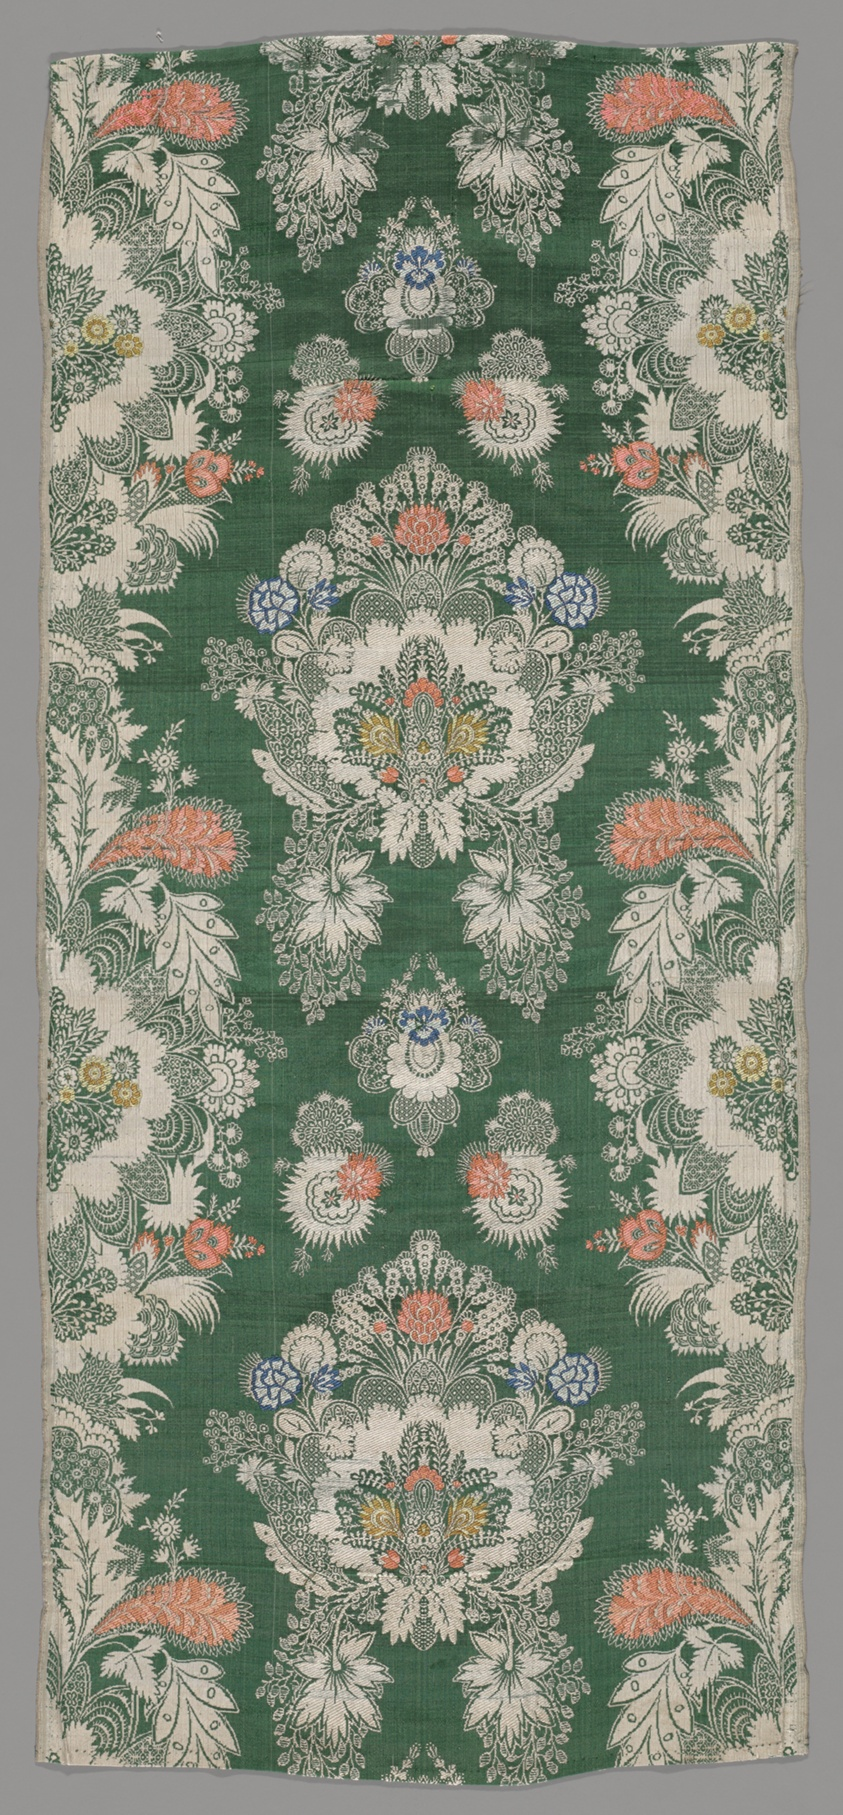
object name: Textile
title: Length of Woven Silk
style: 18th Century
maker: England or Netherlands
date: 1720s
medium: Silk, plain weave with plain interlacings of secondary binding warps and supplementary patterning wefts and 1:3 'Z' twill interlacings of secondary binding warps and supplementary brocading wefts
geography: Netherlands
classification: textile; weaving; silk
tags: foliage, floral motifs, flowers